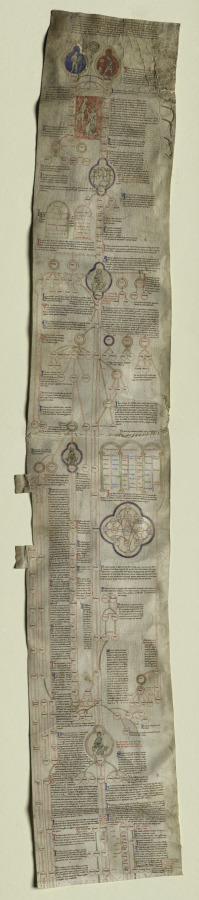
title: Peter of Poitiers's "Compendium Historiae in Genealogia Christi" (pair)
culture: England, Canterbury, 13th century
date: c. 1220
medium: ink and tempera on a vellum roll of four membranes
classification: Manuscript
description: This manuscript roll, composed of four membranes formerly stitched together in a continuous roll about nine feet long, has been divided in the middle for easier visibility and study. The text is an abridgment of biblical history focused on the descent of Christ from Adam. It was written by Peter of Poitiers (about 1130–1205), who taught theology and history in Paris and was widely copied. The present roll is an English copy of Peter's text made shortly after his death. Although manuscript rolls were hung on the walls of a classroom as instructional aids to students, some of them have value beyond their textual and historical interest because of the fine quality of their drawings, as seen here. A comparison with Canterbury manuscripts and stained glass of around 1220 is the basis for the attribution to Canterbury. Peter of Poitiers's aim in this project was to assist students prevented from mastering biblical history because of its length and because they were too poor to own books. His text on roll is the briefest possible summary of biblical history. It is arranged in six historical stages, denoting the six ages of the world, as decreed by theological tradition. The first five ages were inaugurated by Old Testament individuals: Adam, Noah, Abraham, David, and Sedecias. The birth of Christ heralded the sixth stage. Beginning at the top of the first membrane, the text consists of brief biographical entries on the ancestors of Christ (Adam, Noah, Abraham, Moses, and David) and other biblical personalities. These extend to the birth of Christ on the fourth membrane, ending with accounts of Hebrew and Roman kings and the Apostles. Each compendium shows the names of the ancestors inscribed within circles, those of direct descent placed vertically in a central column, others scattered in clusters to the right and left. The decoration of the roll consists of a series of medallions of diverse geometrical frames filled with either a figural drawing or a diagram. The style of these pen-and-ink drawings, some illuminated in tempera or tinted with wash, stems from English manuscript and glass painting attributed to the school of Canterbury Cathedral. The style of the museum's illustrations is so close to the stained glass panels made for Trinity Chapel at Canterbury (about 1220) to suggest that an artist active as a glazier in the Cathedral workshop may also have executed the manuscript. In the least, the painter of the roll manuscript was familiar with the style of the painted glass, and on this basis, a date of about 1220 seems appropriate. Additional evidence is supplied by a psalter illuminated at Canterbury shortly before 1220. The figurative scenes in this psalter were apparently illustrated by the same hand that executed the line and wash drawings in the museum's roll.